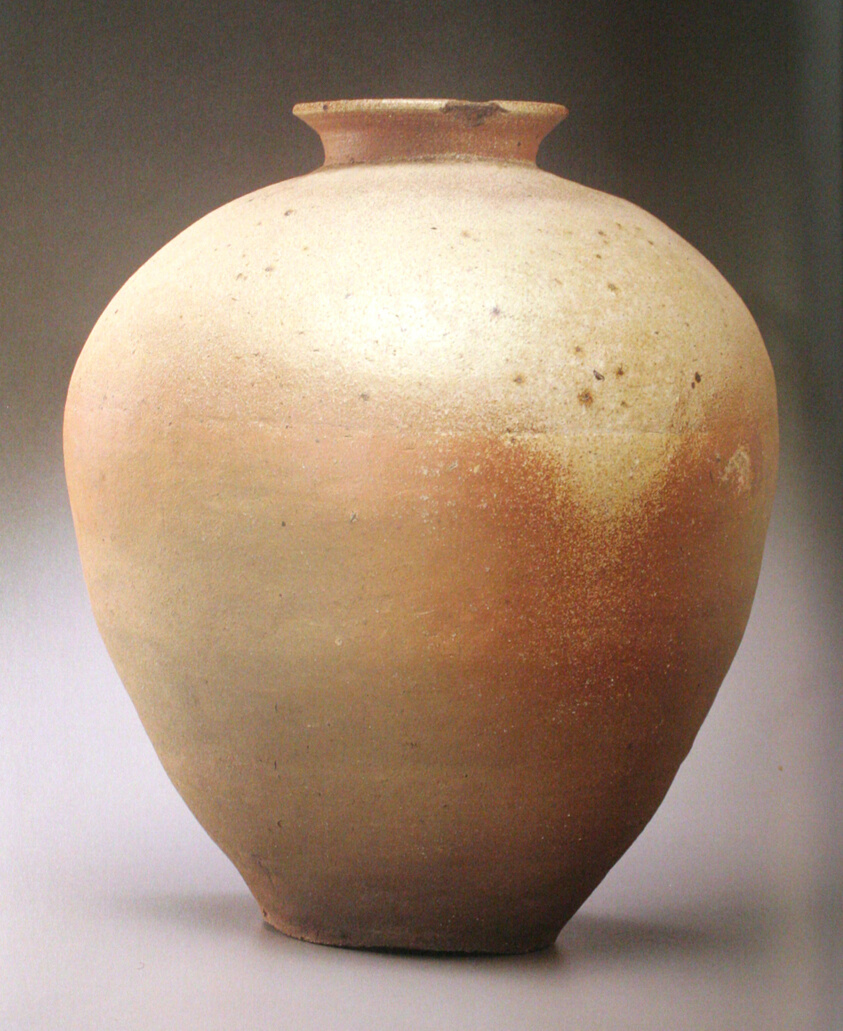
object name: Vessel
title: Tamba-Ware Jar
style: Japanese (culture or style)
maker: Japanese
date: 15th century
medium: Stoneware with ash glaze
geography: Japan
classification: stoneware; ceramics; asian art; vessel